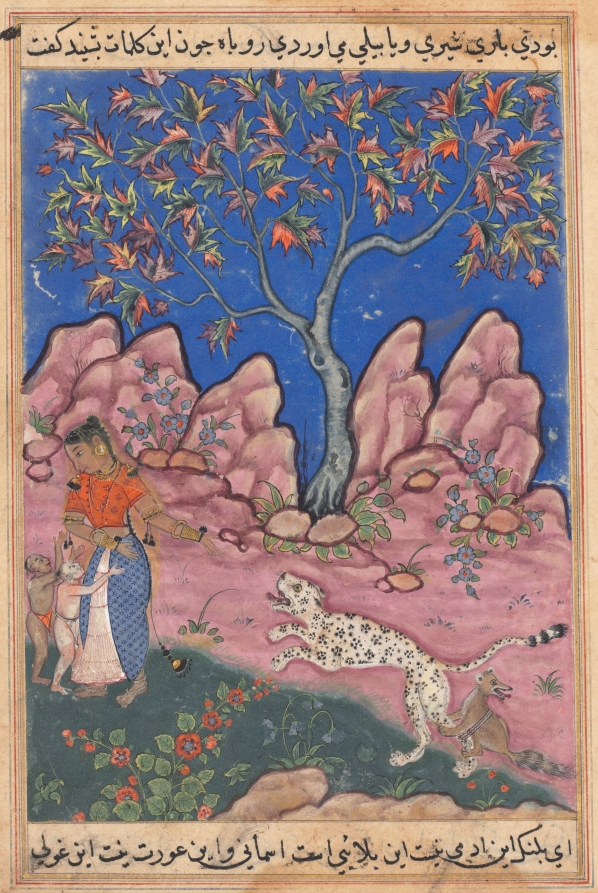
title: The woman conversing with her children, as the leopard returns, egged on by a fox who is tied to his leg, from a Tuti-nama (Tales of a Parrot): Thirtieth Night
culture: Mughal India, court of Akbar (reigned 1556–1605)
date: c. 1560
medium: gum tempera, ink, and gold on paper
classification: Painting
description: For the second time, the leopard appears in hopes of eating the woman and her children. Previously, he had fled after falling for the woman’s clever trick. He returns with the fox’s encouragement but is tricked again by the shrewd woman who convinces him that she is a hyena in human form.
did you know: The large tree in the background is a plane tree, which is a type of sycamore.